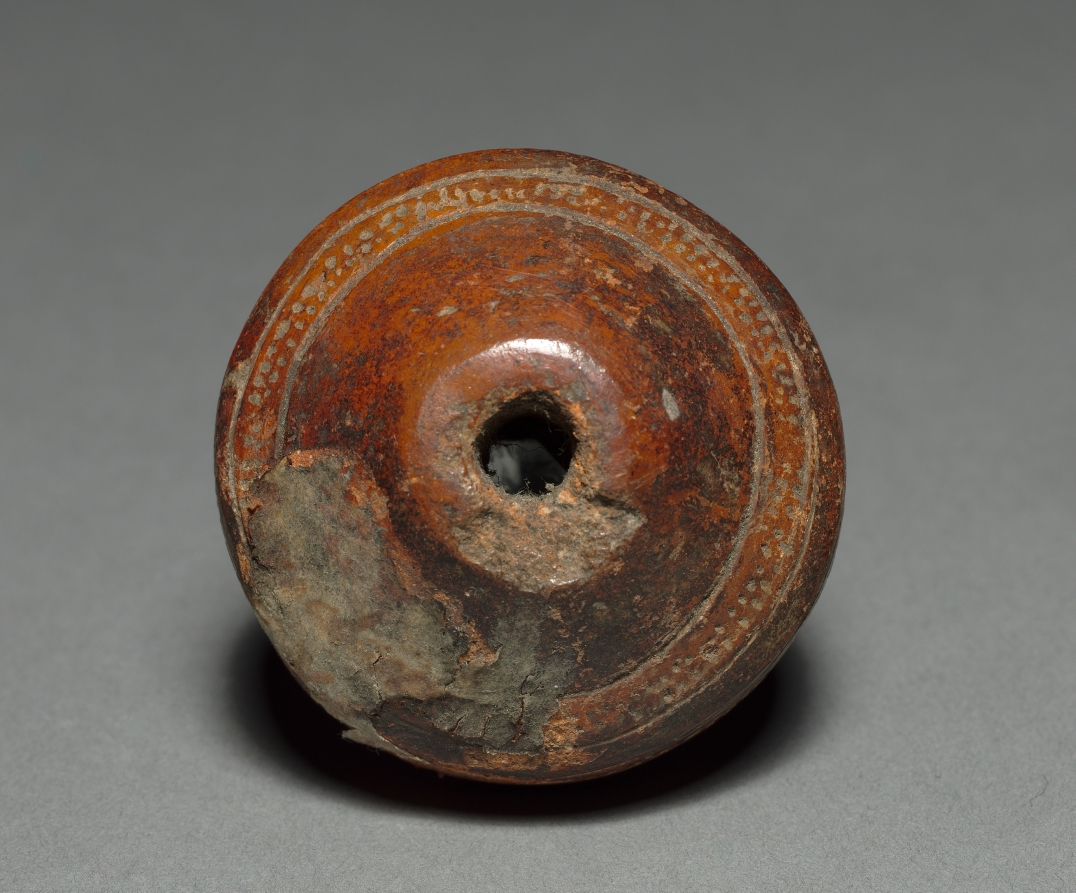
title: Spinning Whorl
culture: Colombia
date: before 1550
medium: red ware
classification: Ceramic